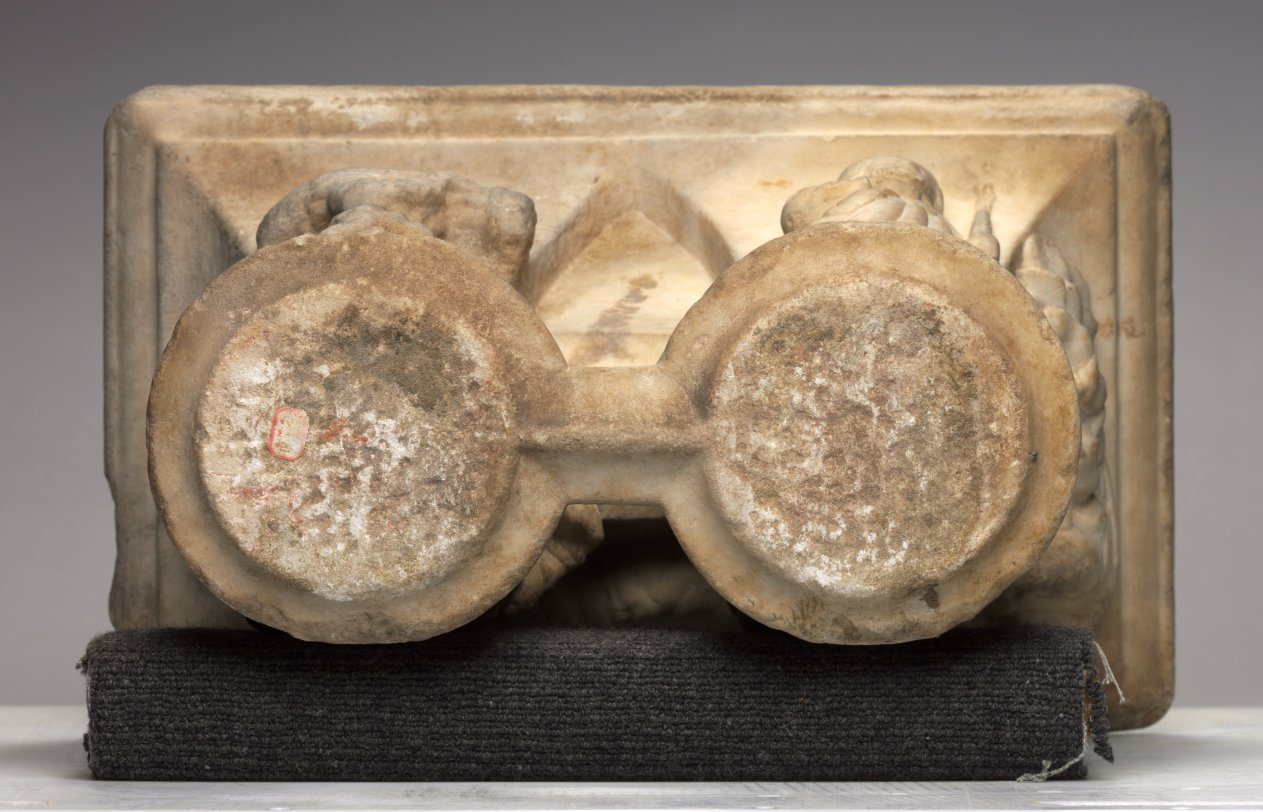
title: Engaged Capital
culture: Southern France, Abbey of Larreule, near Tarbes, 15th century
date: 1400s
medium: limestone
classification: Sculpture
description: This capital belongs to a surviving group including other architectural fragments that once decorated the cloister of the Abbey of Larreule. A cloister was a covered walkway or arcade, usually around all four sides of a square area of grass (the "cloister garth"). The seclusion of the cloister was the monks’ exclusive domain, off limits to others. Here, the monks were supposed to pray, study, meditate, and exercise in privacy and solitude. Such cloister capitals served both to instruct the monks and as a focus for their devotions. Other capitals in this series are installed in the Jardin Massey at Tarbes, near the original abbey. An arch from Larreule has been assembled with other associated French capitals at The Cloisters in New York.